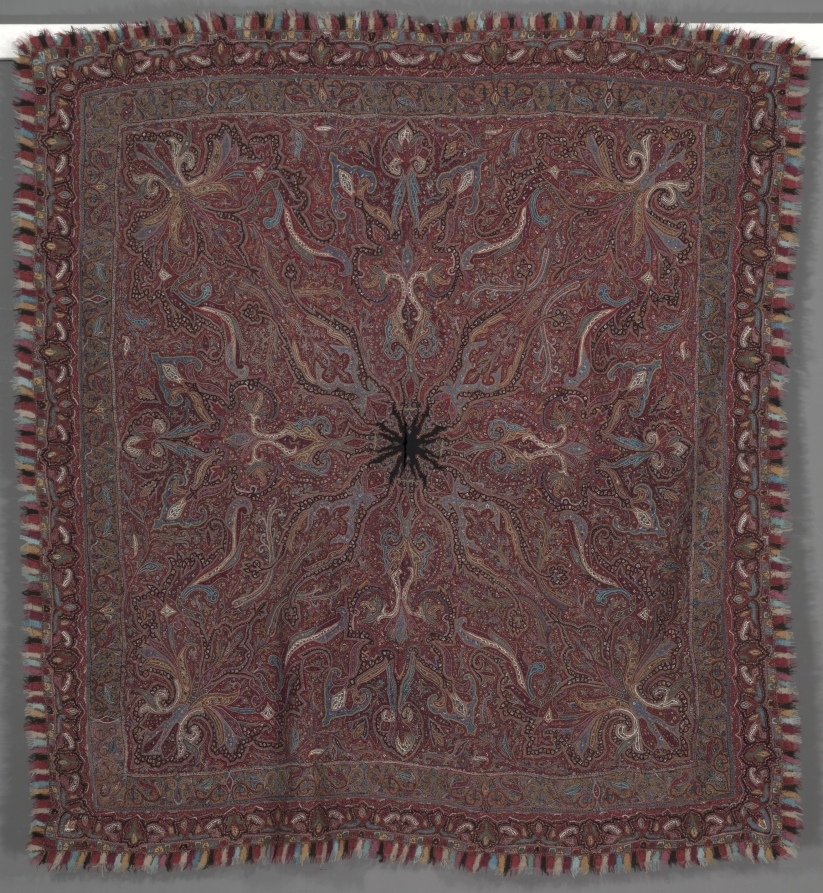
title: Shawl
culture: India, Kashmir, late 19th century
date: 1870s - 1880s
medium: embroidery, large pieced areas: wool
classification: Embroidery